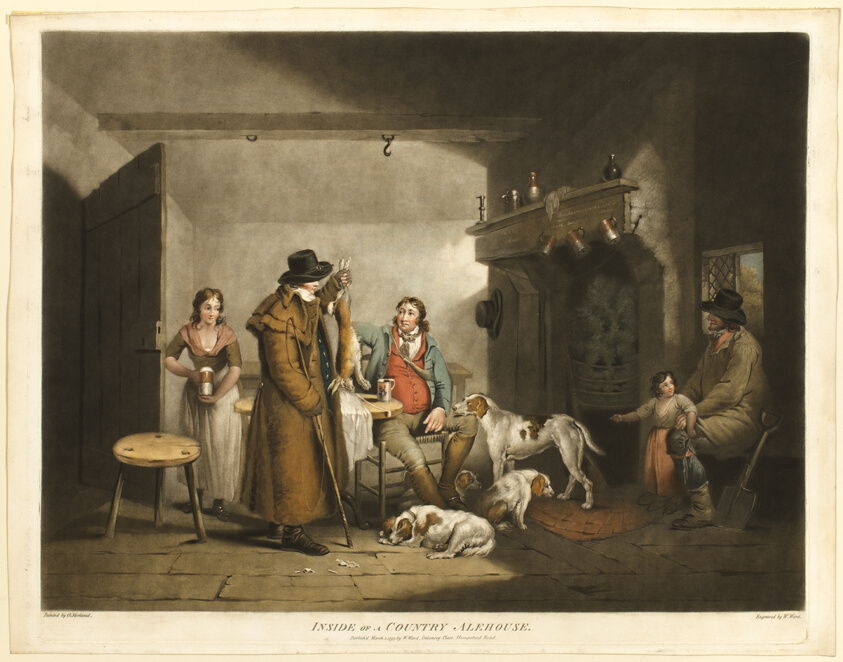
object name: Print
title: Inside of a Country Alehouse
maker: William Ward (English, 1766-1826); after George Morland (English, 1763-1804)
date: published March 1, 1797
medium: Hand-colored mezzotint on cream wove paper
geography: England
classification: mezzotint; print; prints and drawing